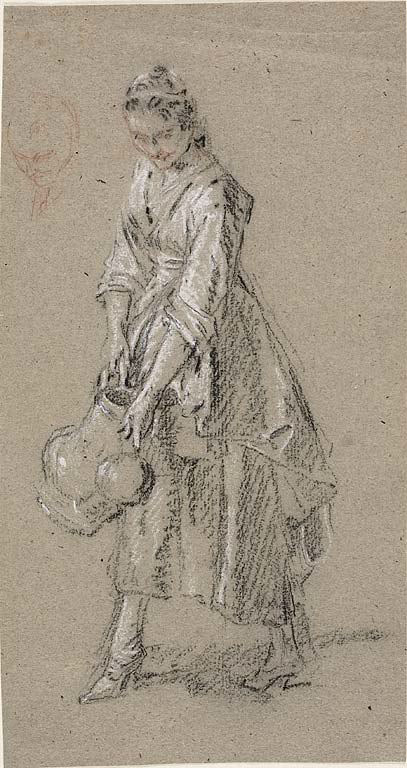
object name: Drawing and Watercolor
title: Study of a Young Woman with a Watering Jug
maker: Nicolas Lancret (French, 1690-1743)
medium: Black chalk, with touches of red chalk, heightened with white chalk, on brownish-gray laid paper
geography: France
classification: drawings (visual works); prints and drawing